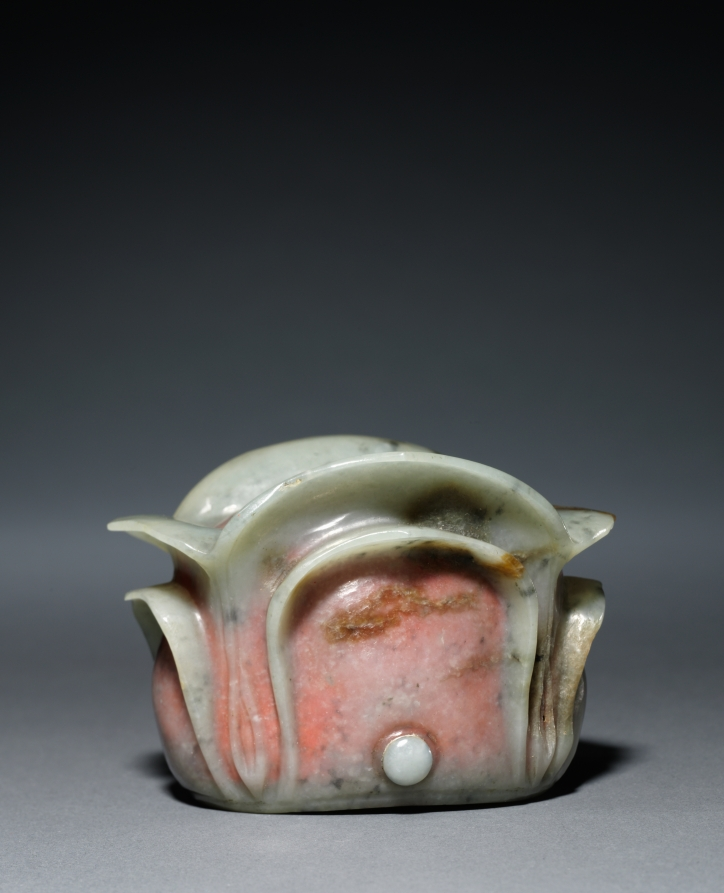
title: Daoist Cap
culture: China, Song dynasty (960-1279) - Yuan dynasty (1271-1368)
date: 960–1279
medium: grayish-green jade with brown and black markings; interior with pink pigment and gold inlays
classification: Jade